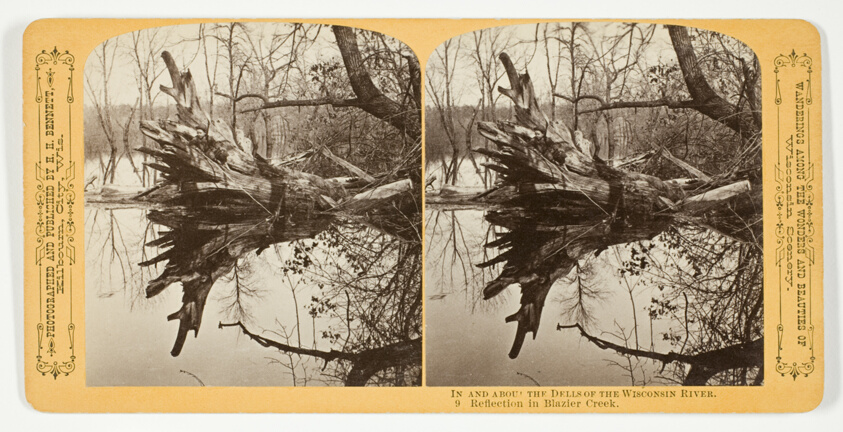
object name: Photograph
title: Reflection in Blazier Creek, No. 9 from the series "In and About the Dells of the Wisconsin River"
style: 19th century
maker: Henry Hamilton Bennett (American, born Canada, 1843-1908)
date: 1870/1908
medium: Albumen print, stereo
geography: Wisconsin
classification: photography; photograph; albumen silver print; stereograph (albumen)